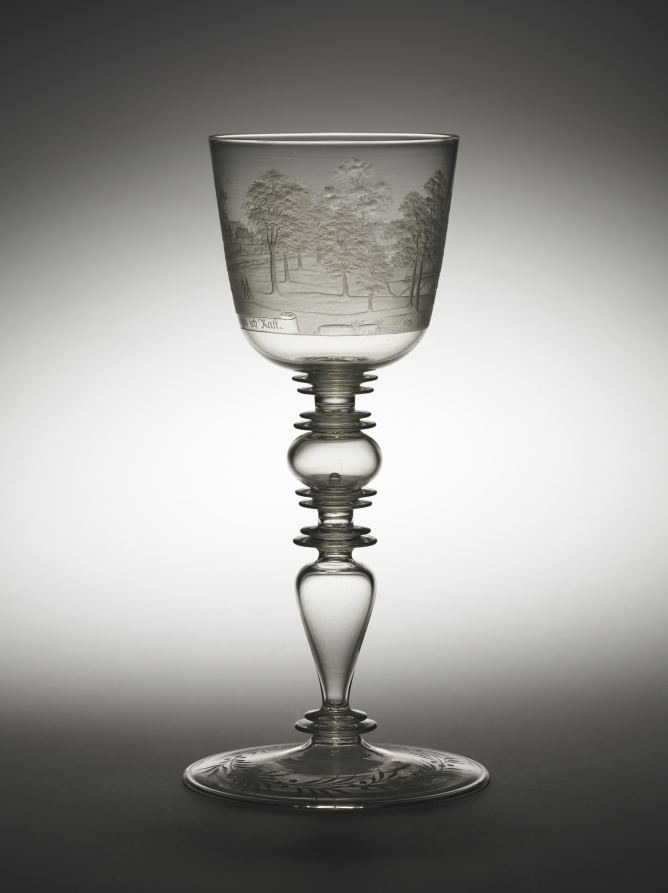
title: Goblet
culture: Bohemia, 17th century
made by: Hermann Schwinger (German, 1640–1683)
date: c. 1680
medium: glass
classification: Glass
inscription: signed and dated. Two inscriptions, one appears on the log held by two men: Es Ruhet auf beiden (It rests on both); the other appears below the scene: Deine Last ist meine Last. Ruhert du so habe ich Rast (Your burden is my burden. It you rest then so have I rest).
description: View of the Panierplatz in Nuremberg, and Allegory.